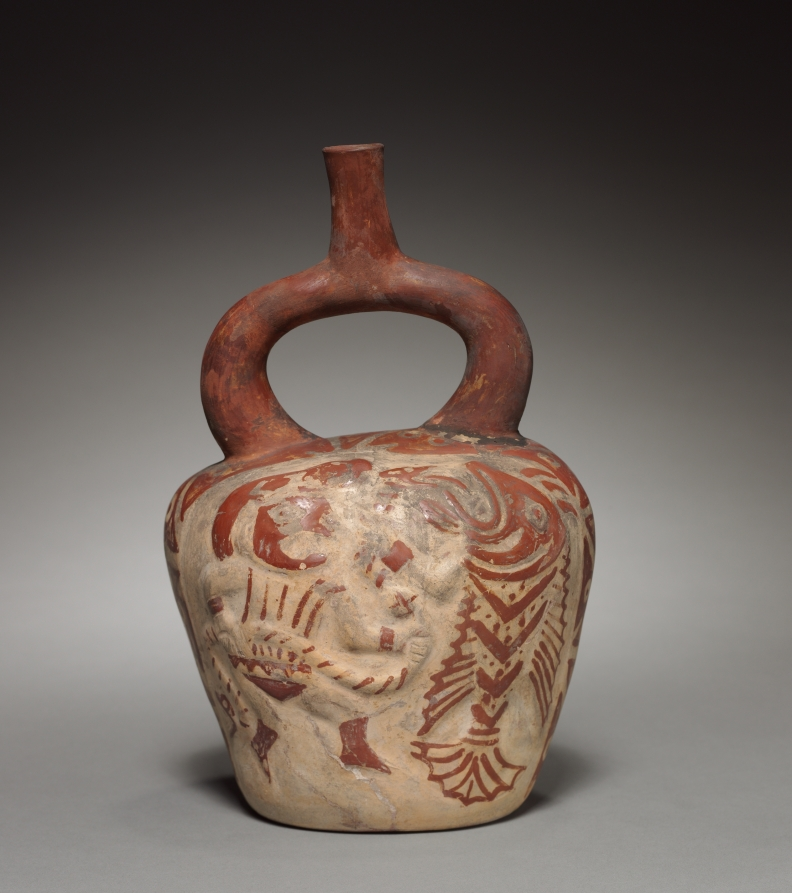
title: Bottle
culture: Peru, Chimú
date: c. 300–500 CE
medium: pottery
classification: Ceramic